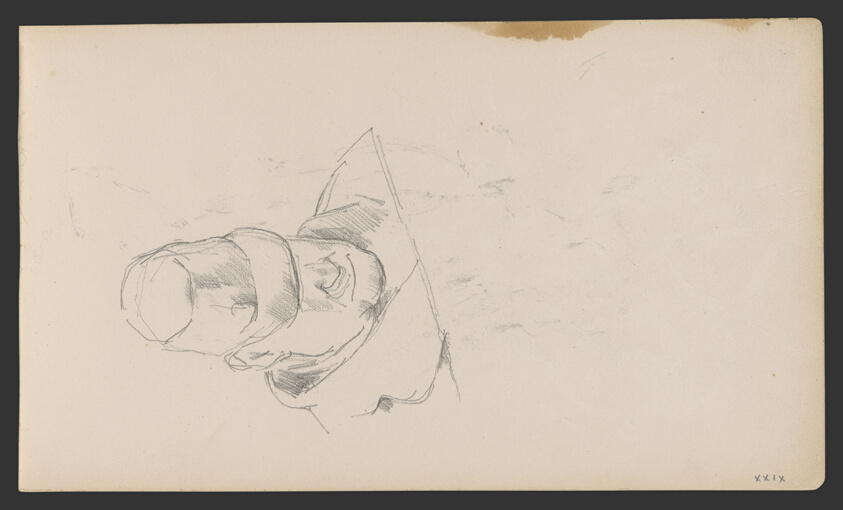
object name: Drawing and Watercolor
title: Sketchbook No. 2 (L'Estaque)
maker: Paul Cézanne; French, 1839-1906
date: 1875–86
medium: Graphite and pen and ink drawings on paper, bound into a book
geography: France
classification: sketchbook; graphite; prints and drawing; paper